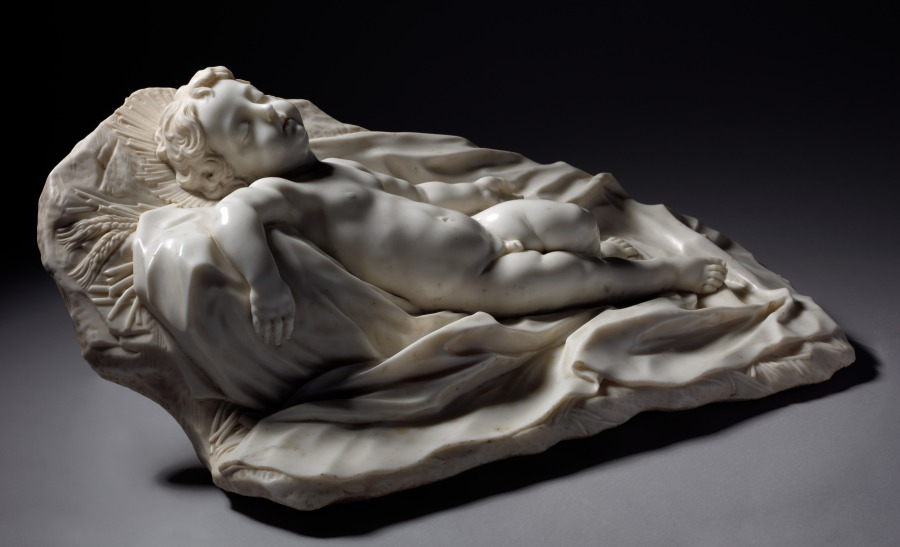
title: Sleeping Christ Child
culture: Italy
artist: Filippo Parodi (Italian, 1630–1702)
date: c. 1675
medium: marble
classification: Sculpture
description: Christ—no longer an infant, but a young child—sprawls on a bed of straw, his head thrown back in slumber and his right arm dangling. The simple radiance framing his head indicates his divinity. Representations of the sleeping Christ child were enduringly popular, not only because of the subject’s inherent charm, but sleep, as a metaphor for death, encouraged pious Christians to meditate on Christ’s humanity and his eventual suffering and death. Filippo Parodi’s Sleeping Christ Child beguiles with lifelike detail. Parodi used varying degrees of polish to differentiate surface textures: Christ’s body is burnished to a soft gleam, while his hair and the straw are more roughly carved, absorbing rather than reflecting the light. Parodi exploited the sensuous and tactile possibilities of the marble to enhance the emotional impact of his piece, a tactic learned from the master of Italian Baroque sculpture, Gianlorenzo Bernini.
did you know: Tender images of the Christ child sleeping encouraged devout Christians to meditate on Christ’s humanity.